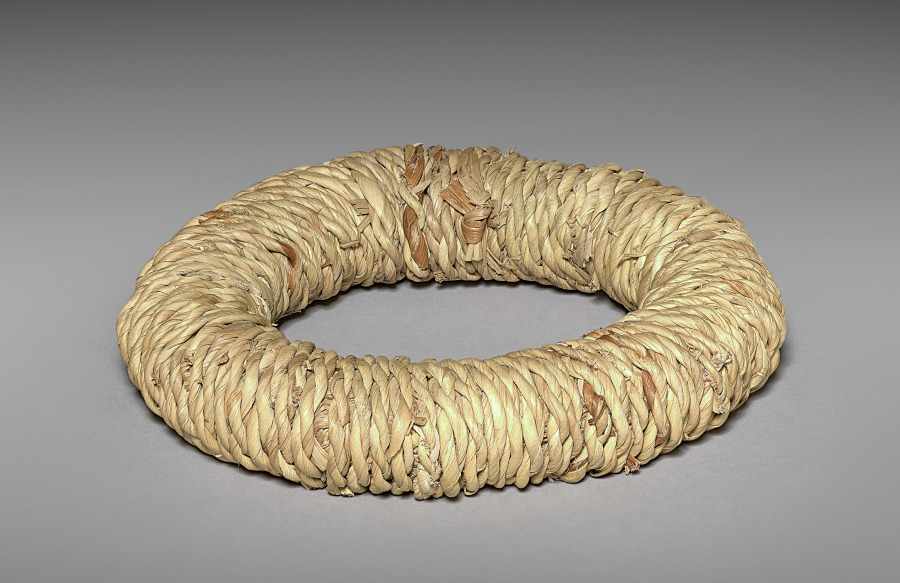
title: Jar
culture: Thailand, Ban Chiang, Neolithic Period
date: 3000s BCE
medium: reddish earthenware with painted decoration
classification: Ceramic